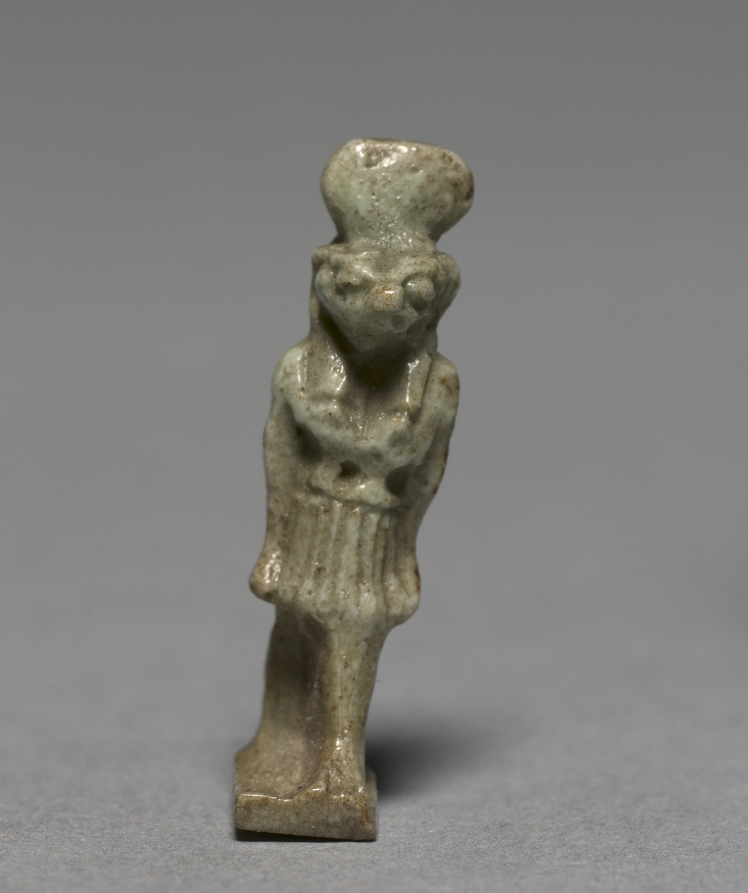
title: Amulet of Ra-Horakhty (?)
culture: Egypt, Late period (715–332 BCE), Dynasty 30–Greco-Roman period (332 BCE–395 CE), Ptolemaic dynasty (305–30 BCE)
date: 380–30 BCE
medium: gray green faience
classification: Amulets